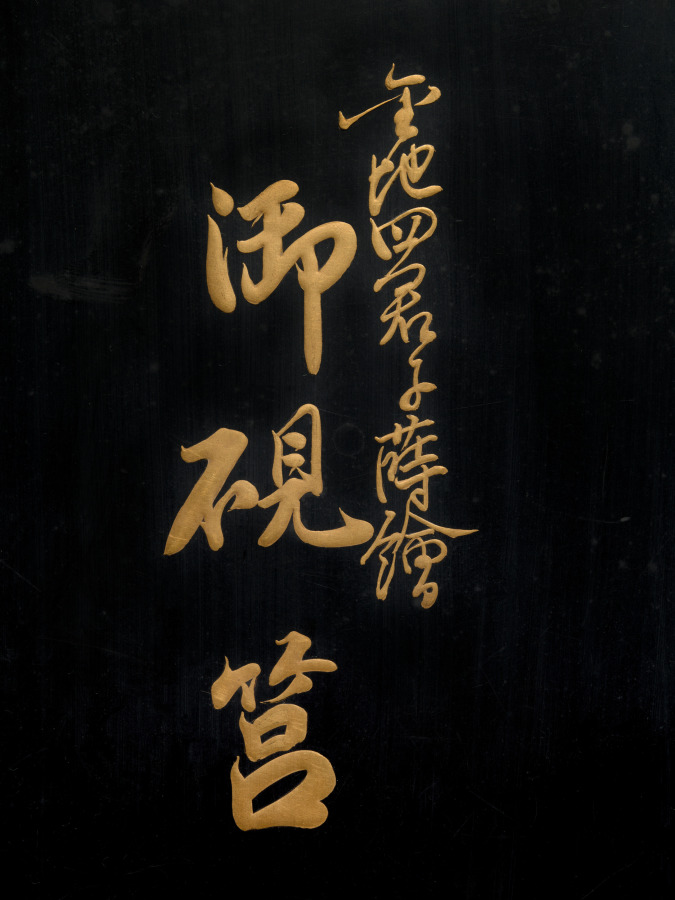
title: Writing Box (Suzuribako) with Chrysanthemum and Plum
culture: Japan, Meiji period (1868–1912)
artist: Sasaki Takayasu (Japanese, 1845–1929)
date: late 1800s-early 1900s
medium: Lacquer over wood with gold and silver sprinkled powder (maki-e)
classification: Lacquer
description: Both functional and elegant, this is a container for an ink stone, brushes, and ink from a set of writing tools that included a larger box for paper. Against a sleek gold lacquered ground, its artist has used restraint in sprinkled powder decoration (maki-e) to produce the design of cockscomb and harvested rice on the interior of the lid.